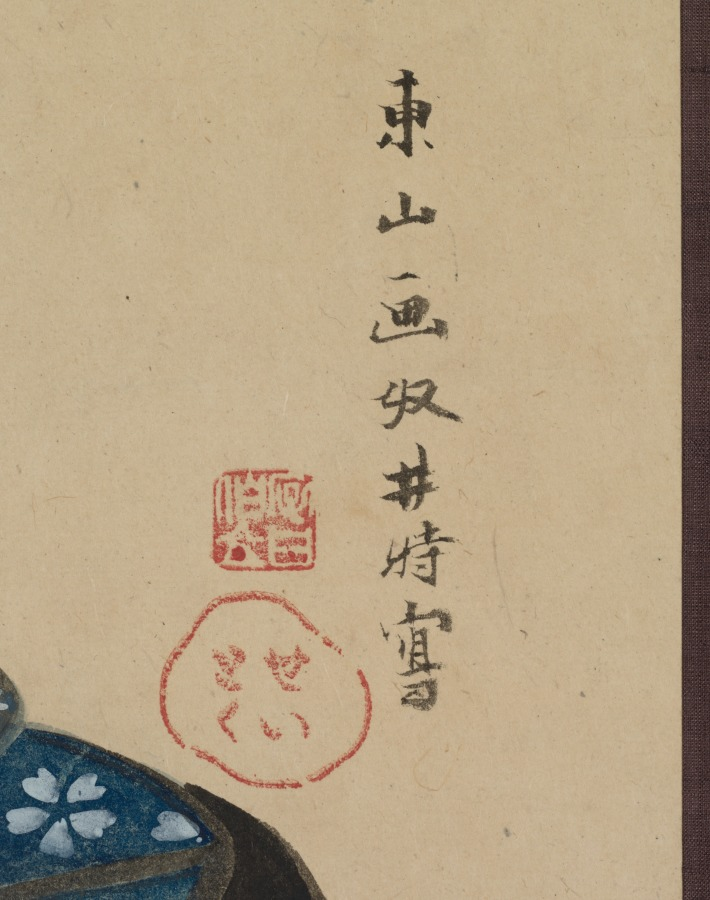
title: A Beauty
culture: Japan, Edo period (1615–1868)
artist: Gion Seitoku (Japanese, active late 1700s–early 1800s)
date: early 1800s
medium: hanging scroll; ink and color on paper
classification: Painting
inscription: 東山画奴井特寫 「字日伯立」白文方印・「せいとく」朱文千鳥印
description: A Kyoto-based ukiyo-e painter, Gion Seitoku specialized in portraying women from Gion and Shimabara, licensed brothel districts in that city. He was known for detailing faces with subtle modeling to heighten a sense of realism. During the 1700s and 1800s, wearing iridescent, greenish lip gloss made from safflower was in vogue. In addition, Japanese women almost universally practiced the custom of artificially blackening their teeth with a stain.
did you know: The person's lipstick is made from safflower.